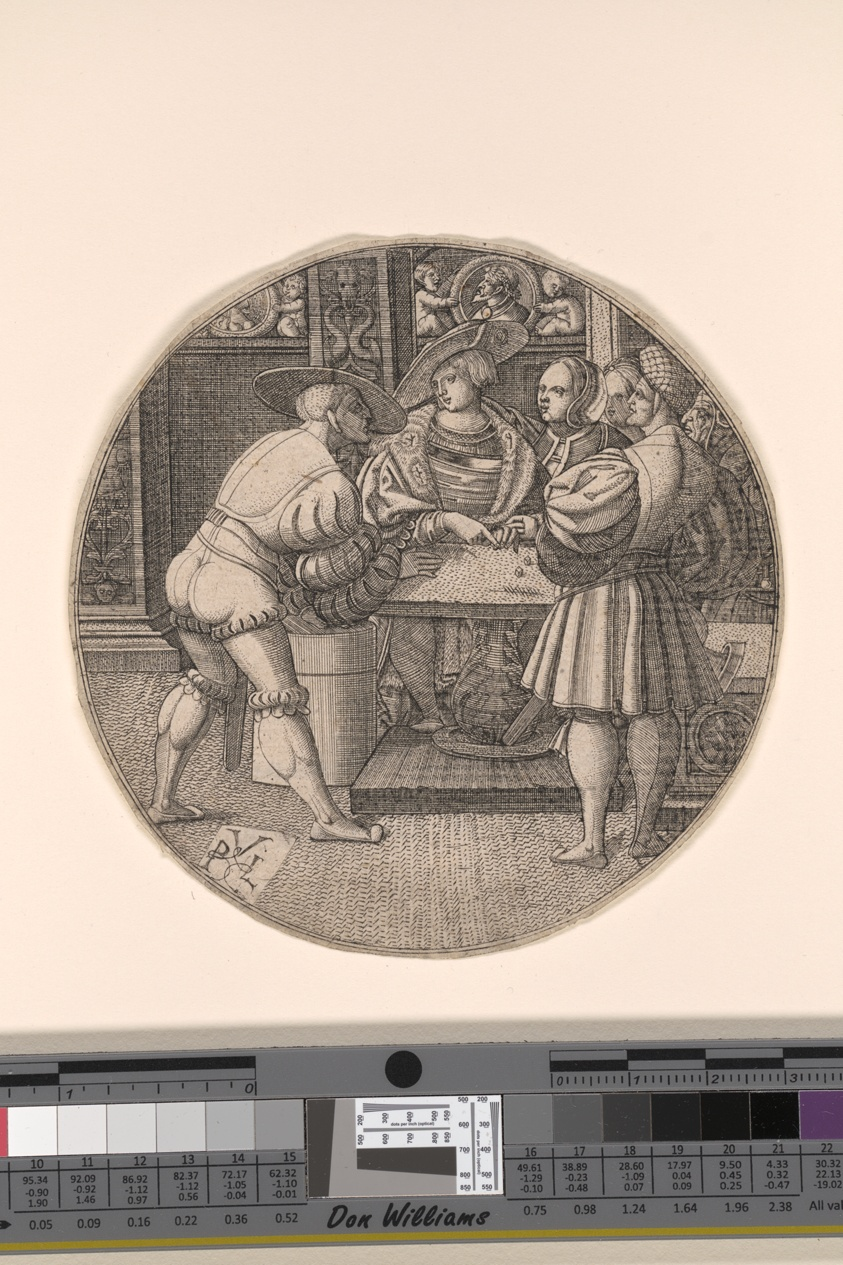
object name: Print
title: Men Playing a Game of Dice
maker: Master PVL; Dutch, active early 16th century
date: c. 1520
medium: Engraving on paper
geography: Netherlands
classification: engraving; paper; print; prints and drawing